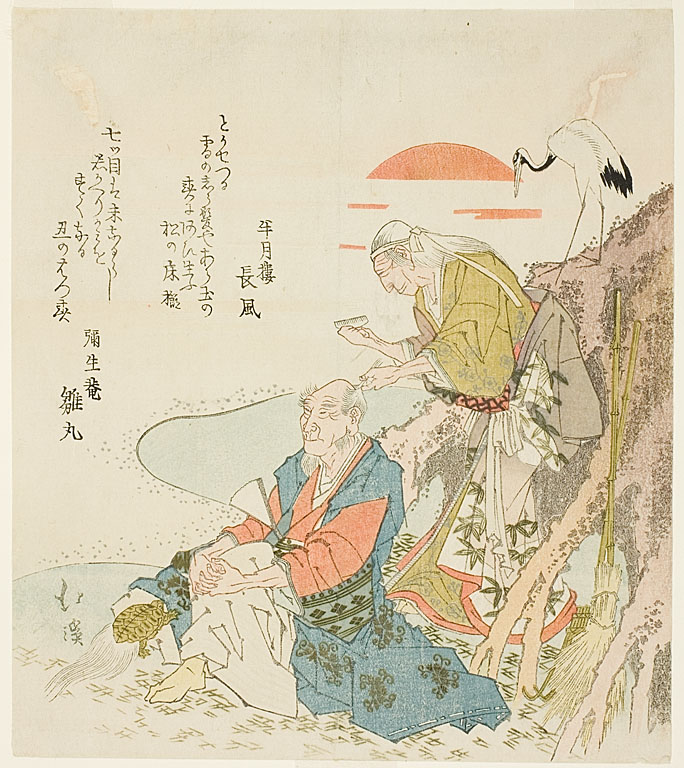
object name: Print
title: The Old Couple from Takasago in Sunrise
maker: Totoya Hokkei (Japanese, 1780-1850)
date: early 19th century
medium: Color woodblock print; surimono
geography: Japan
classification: woodblock print; print; asian art